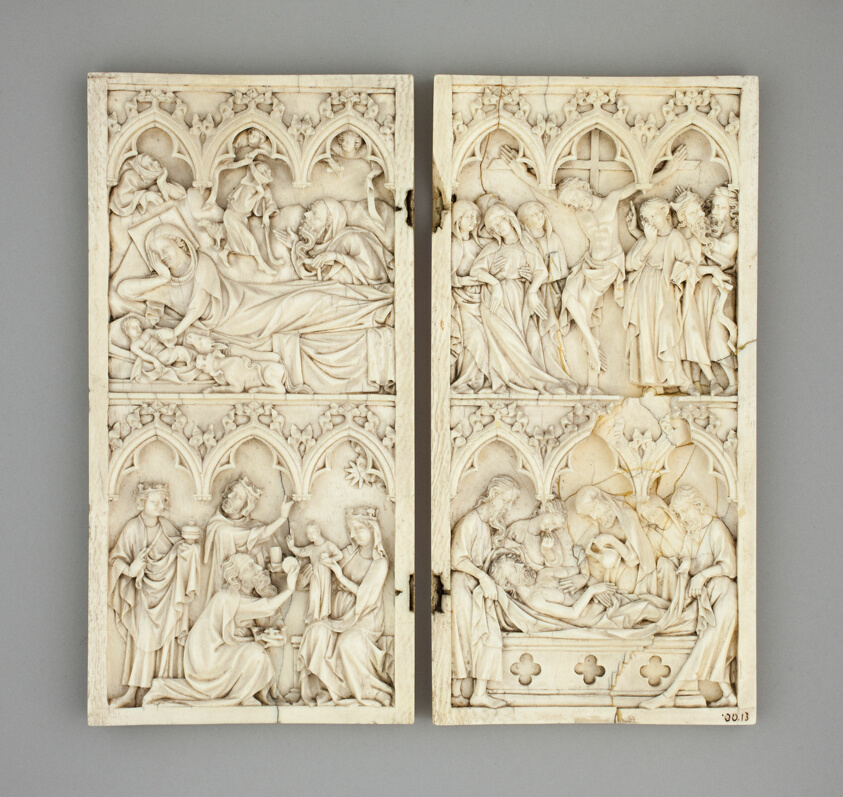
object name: Sculpture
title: Diptych with Scenes from the Life of Christ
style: 14th century, medieval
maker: French; Paris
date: 1340/60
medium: Ivory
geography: France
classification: ivory; relief; sculpture; french; religious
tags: Christian subjects, women, woman, animals, architectural, architechture, Burial, death, scrolls (motifs), saints, Saint John the Baptist, babies, child, mother and child, mother, holy family, Virgin and child/Madonna and child, Virgin Mary, crucifixions, kings, shepherds, birth, Jesus, men, religious scenes, religious figures, religious, religion, Christianity